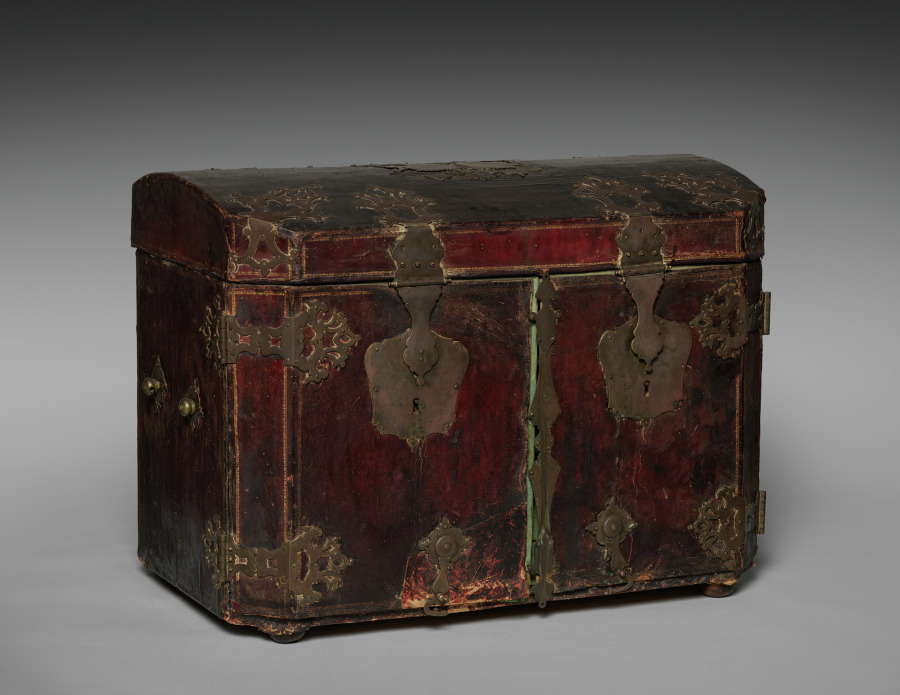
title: Chest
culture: Italy, Venice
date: 1700s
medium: leather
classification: Miscellaneous